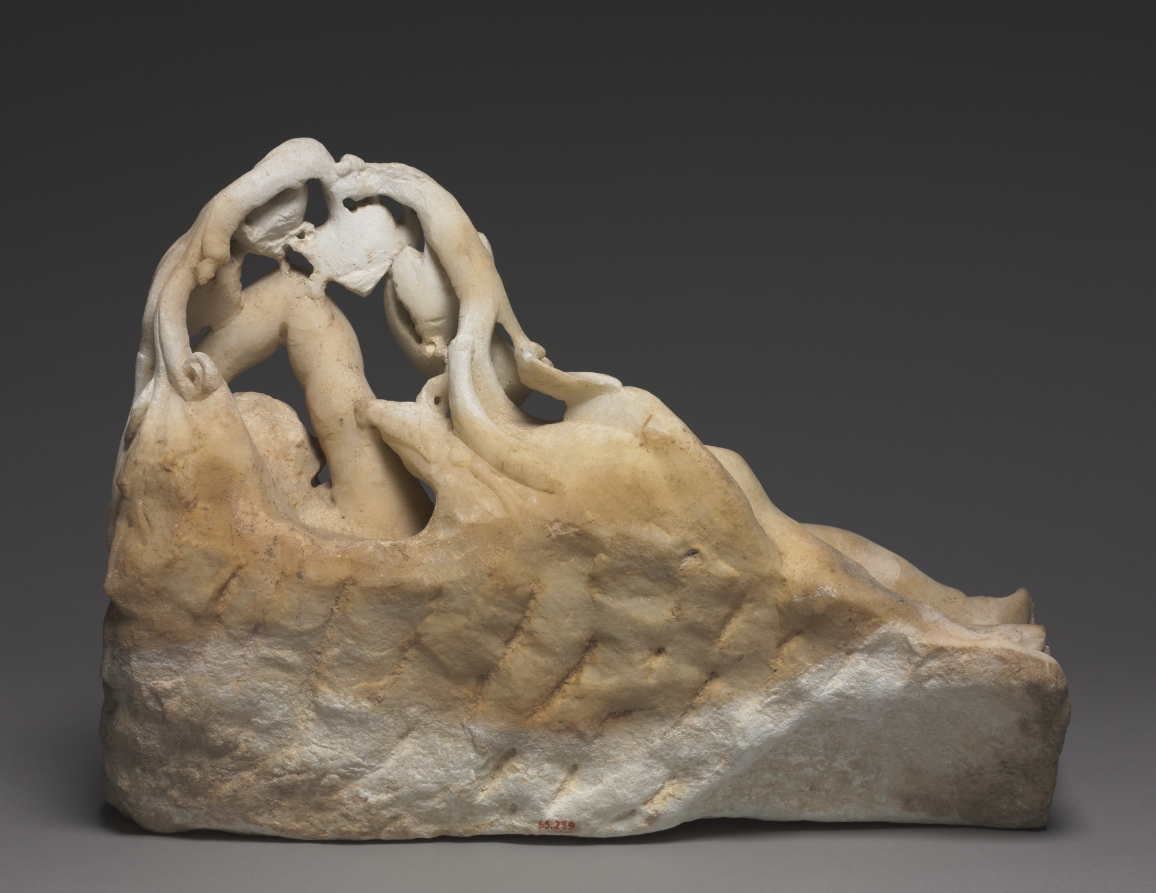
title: Jonah Under the Gourd Vine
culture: Anatolia, late Roman-early Christian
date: 280–90 CE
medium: marble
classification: Sculpture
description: After disobeying the Lord’s command to proclaim judgment on the city of Nineveh, the Old Testament prophet Jonah was cast into the sea, swallowed by a sea monster, and ultimately cast ashore. When asked a second time, Jonah obeyed the Lord but became displeased when the city was spared. After pleading for Nineveh’s destruction, Jonah left the city and rested in the shadow of a large gourd vine. The Lord, however, made the vine wither, exposing Jonah to the burning sun.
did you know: The sculpture shows the dramatic moment when the Jonah, having languished in the desert, is saved by the shade of a gourd vine. The sculptor paid great attention to detail such as Jonah's bushy beard echoing the large leaves overhead.